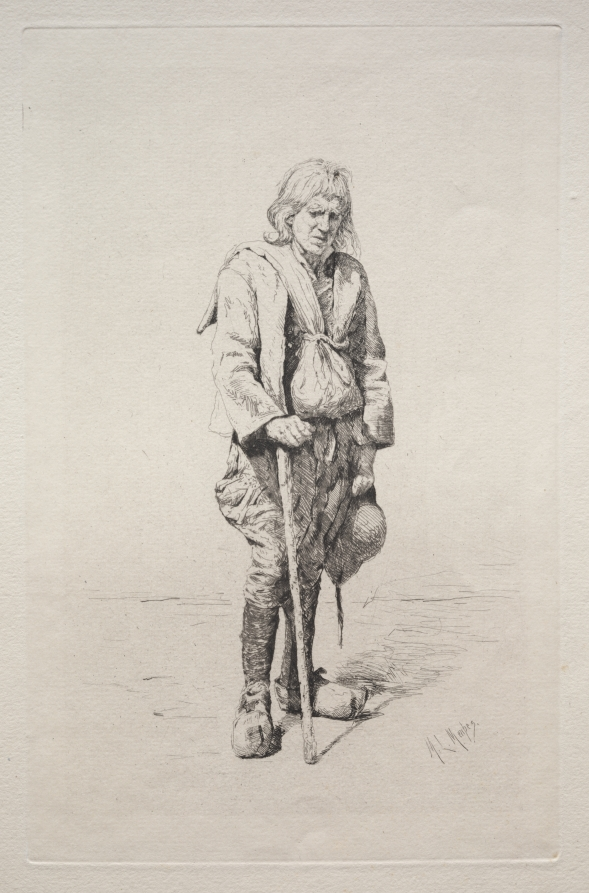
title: Man with Walking Stick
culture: England, 19th century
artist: Mortimer Menpes (British, 1860–1938)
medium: etching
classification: Print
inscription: artist's signature inscribed in plate: M.L. Mortimer (l.r.)